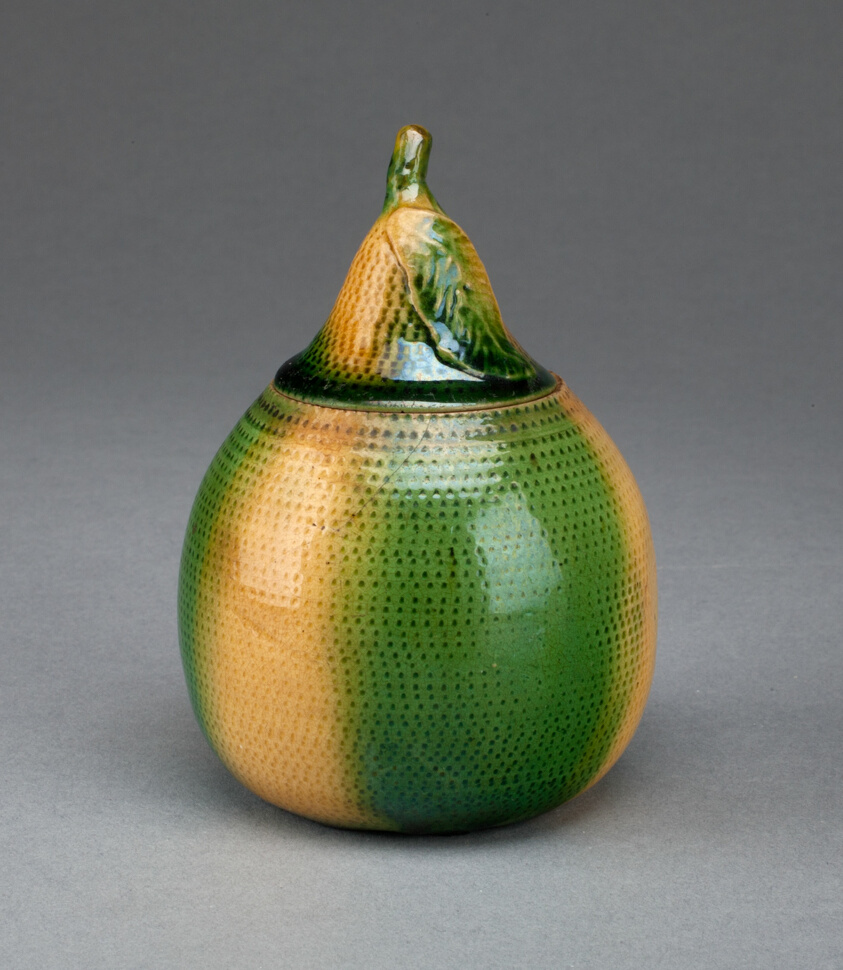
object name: Ceramics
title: Container in the shape of a pear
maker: Staffordshire, England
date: c. 1765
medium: Lead-glazed earthenware (creamware)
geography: Staffordshire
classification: earthenware; ceramics; creamware; european decorative arts; lead-glazed earthenware